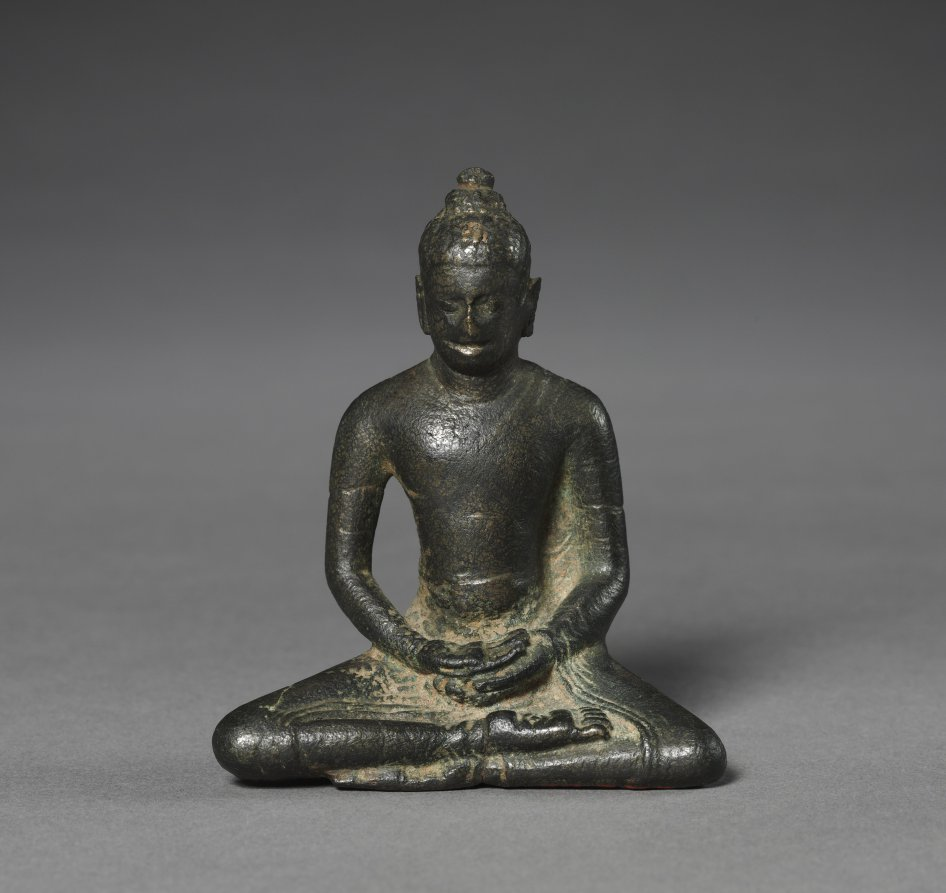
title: Sakyamuni Buddha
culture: Ceylon, Anuradhapura style, 7th-8th Century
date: 600s-700s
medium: bronze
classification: Sculpture